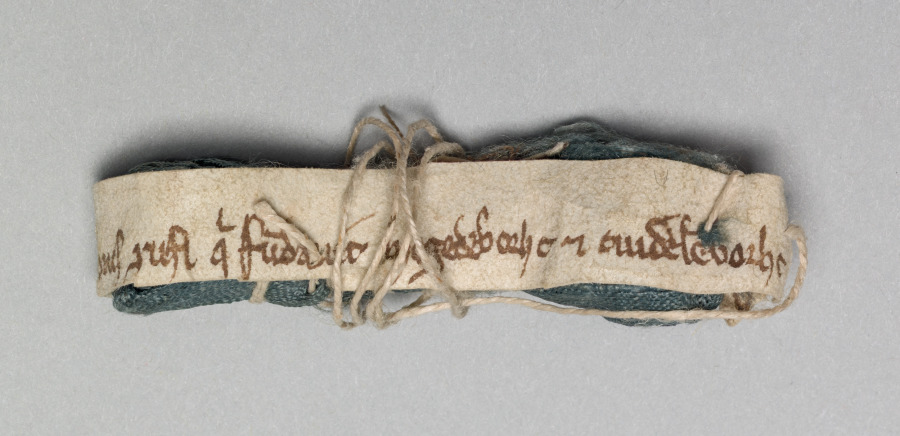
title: Relic of St. Adelaide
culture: Germany, Lower Saxony?, Romanesque period, 11th century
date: c. 1045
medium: bone, plain weave blue silk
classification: Metalwork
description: This relic is housed inside of the portable altar commissioned by Countess Gertrude of Brunswick, one of the Guelph Treasure’s earliest and most sumptuous objects.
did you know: This bone is thought to belong to a finger (metacarpal) although the curve is too prominent for a human. An exact determination can't be made without unwrapping it.